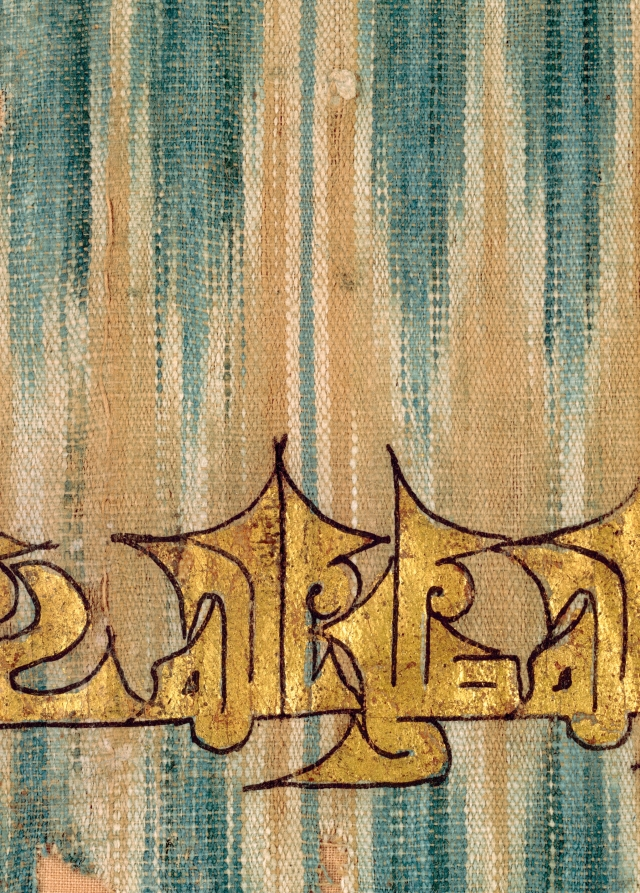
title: Ikat tiraz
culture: Yemen, San'a', Zaydi Imam period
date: 960–80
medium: resist-dyed warp (ikat); plain weave with inscription: cotton and gold leaf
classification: Textile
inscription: Kufic inscription, translated as: ". . . [a]l-Dá'i ilá al-Haqq, Commander of the Believers, Yusuf b. Yahya b. al-Nasir li-Din Allah Ahmad, son of the apostle of God, may God bless them all." At the bottom, the word "to God" is inverted. "Yusuf ibn Yahya" ruled AD 968-998)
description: The "flame" pattern was dyed on the vertical warp threads before weaving began by tightly binding them to resist dye penetration, and repeated for each color. The process and fabric are called ikat, a Malaysian word which may have originated in South Arabia. Yemeni ikats with historical Arabic inscriptions from the 10th century are among the oldest known. This text, written in Kufic script with gold leaf outlined in black, identifies a ruler of the Yemen: ". . . [a]l-Da’i ila al-Haqq, Commander of the Believers, Yusuf b. Yahya b. al-Nasir li-Din Allah Ahmad, son of the apostle of God, may God bless the all." The Arabic phrase "to God" is inverted at the bottom.